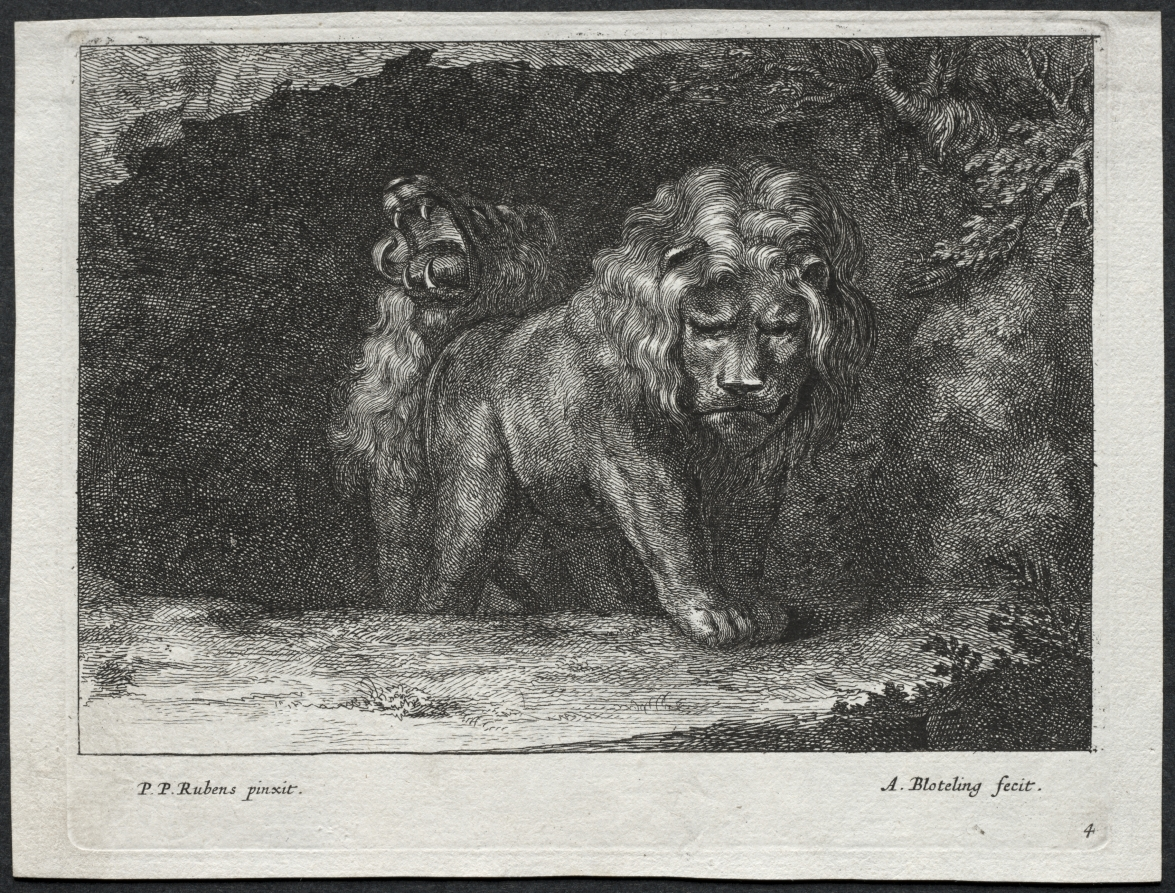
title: Various Lions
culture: Netherlands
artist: Abraham Blooteling (Dutch, 1640–1690)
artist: after Peter Paul Rubens (Flemish, 1577–1640)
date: 1655–90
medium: etching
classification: Print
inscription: Verso: indecipherable collector's stamp (faded due to cleaning)